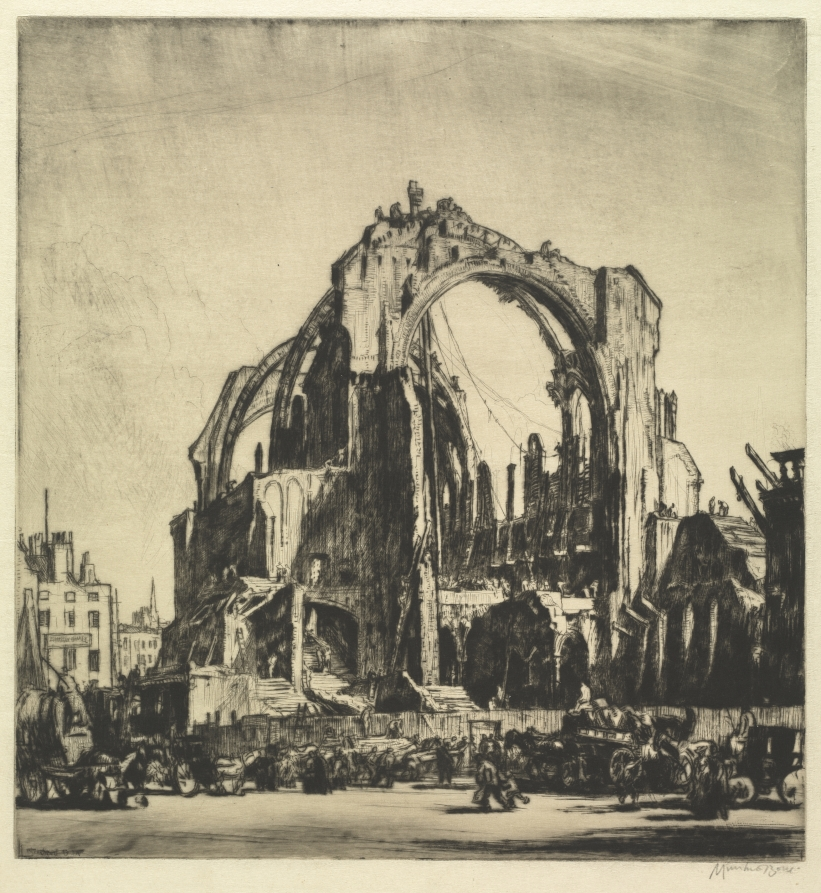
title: Demolition of St. James Hall, Exterior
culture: England, 20th century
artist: Muirhead Bone (British, 1876–1953)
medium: drypoint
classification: Print